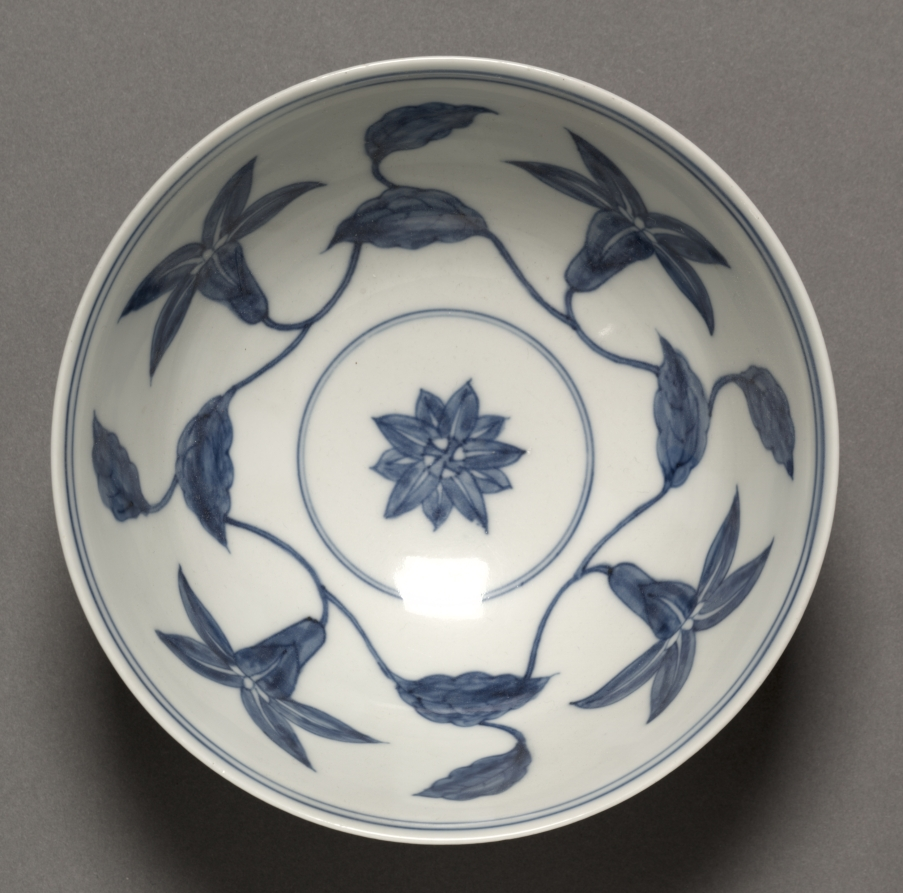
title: Bowl with Lily Scrolls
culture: China, Jiangxi province, Jingdezhen, Ming dynasty (1368–1644), Chenghua mark and period (1465–87)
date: 1465–87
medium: porcelain with underglaze blue decoration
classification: Ceramic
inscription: 大明成化年製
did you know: Gently curving arabesque scrolls of lilies and leaves decorate the inside and outside of this bowl.